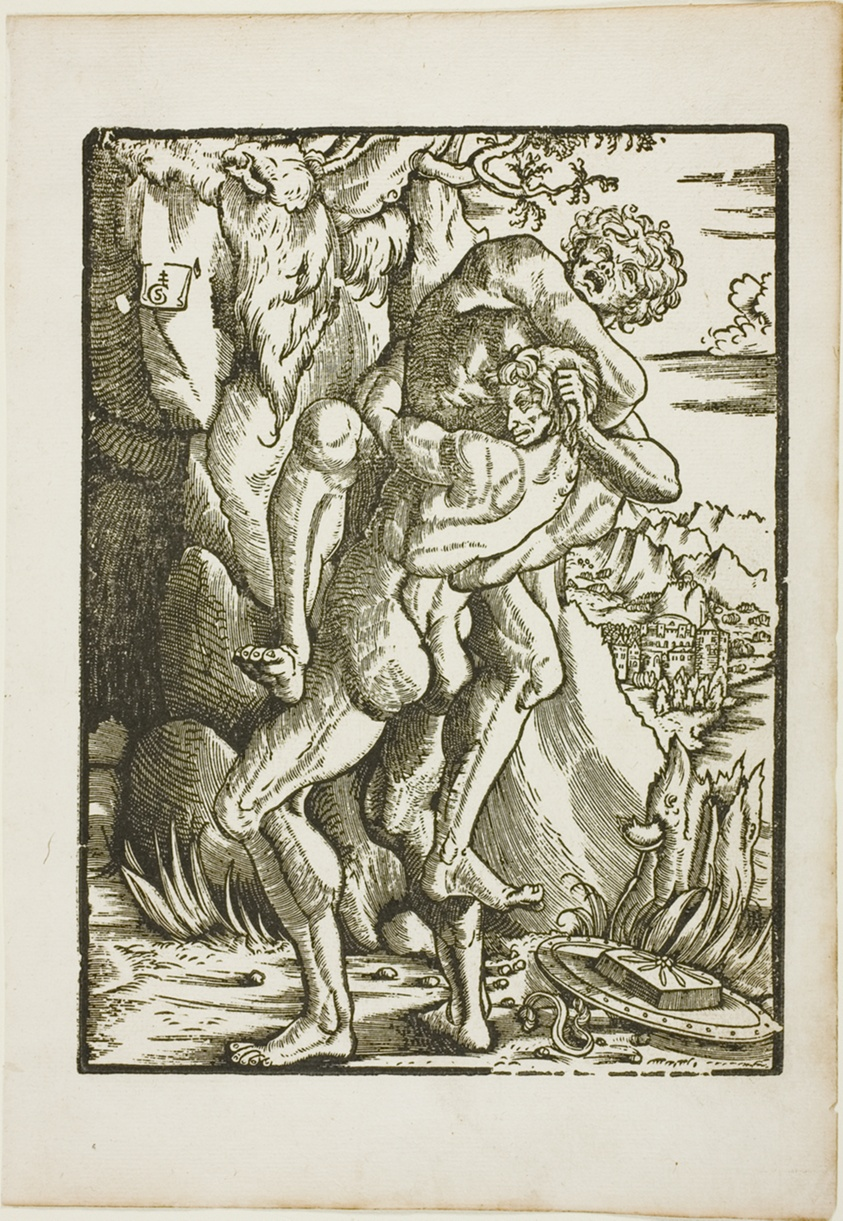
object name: Print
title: The Labors of Hercules: Hercules and Antaeus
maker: Gabriel Salmon (French, active 1504-1542)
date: c. 1528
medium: Woodcut on paper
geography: France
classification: woodcut; print; prints and drawing